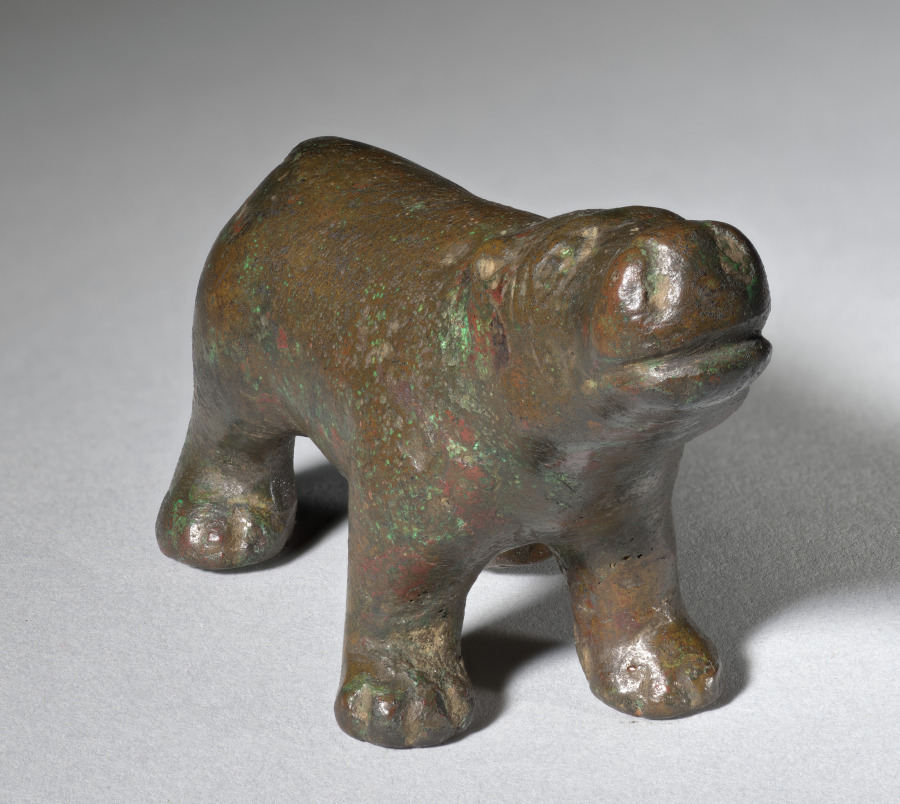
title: Hippopotamus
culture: Italy, Rome, Greco-Roman Period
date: 332 BCE–395 CE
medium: bronze, solid cast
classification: Sculpture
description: This hippopotamus steps forward with its rear left leg lifted off the ground and its head arched upwards. The hippopotamus was a Nilotic animal associated with Egypt and the Nile River that was brought to Rome and put on display in the Colosseum as part of venationes, or wild beast hunts. The rise of “Egyptomania” in the Roman Empire surged under the emperor Hadrian (reigned AD 117–38). Extant Egyptian examples of hippopotamus figurines are less animated and made of materials such as stone or pottery rather than bronze, making the pose and materiality of this object distinctly Greco-Roman.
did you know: The word hippopotamus is a Greek compound word combining “horse” (hippos) and “river” (potamos).